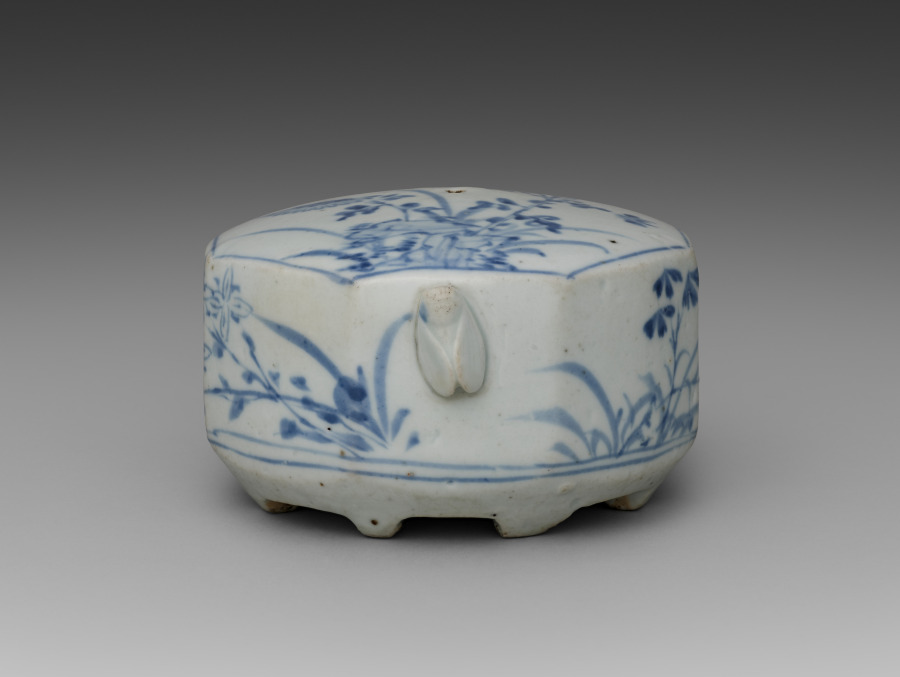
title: Octagonal Water Dropper Decorated with Flower Design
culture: Korea, Joseon dynasty (1392–1910)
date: late 1700s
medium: Porcelain with blue and white decoration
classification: Ceramic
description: A water dropper was an essential utensil for a literati man of the Joseon dynasty (1392–1910) in writing calligraphy. It was used to add water, by small drops, to an inkstone while grinding an ink stick. This work has a small spout in the shape of a cicada. This decorative element not only adds a sense of whimsical sensibility to this scholarly utensil, but also aims to symbolize the aspiration for scholarly achievement—as loud as the cicada’s song.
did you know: A small spout in the shape of a cicada is placed on one of the octagonal sides. This decorative element not only adds a sense of whimsical aesthetic sensibility to this scholarly utensil, but also aims to symbolize the aspiration for scholarly achievement—as loud as the cicada’s song.